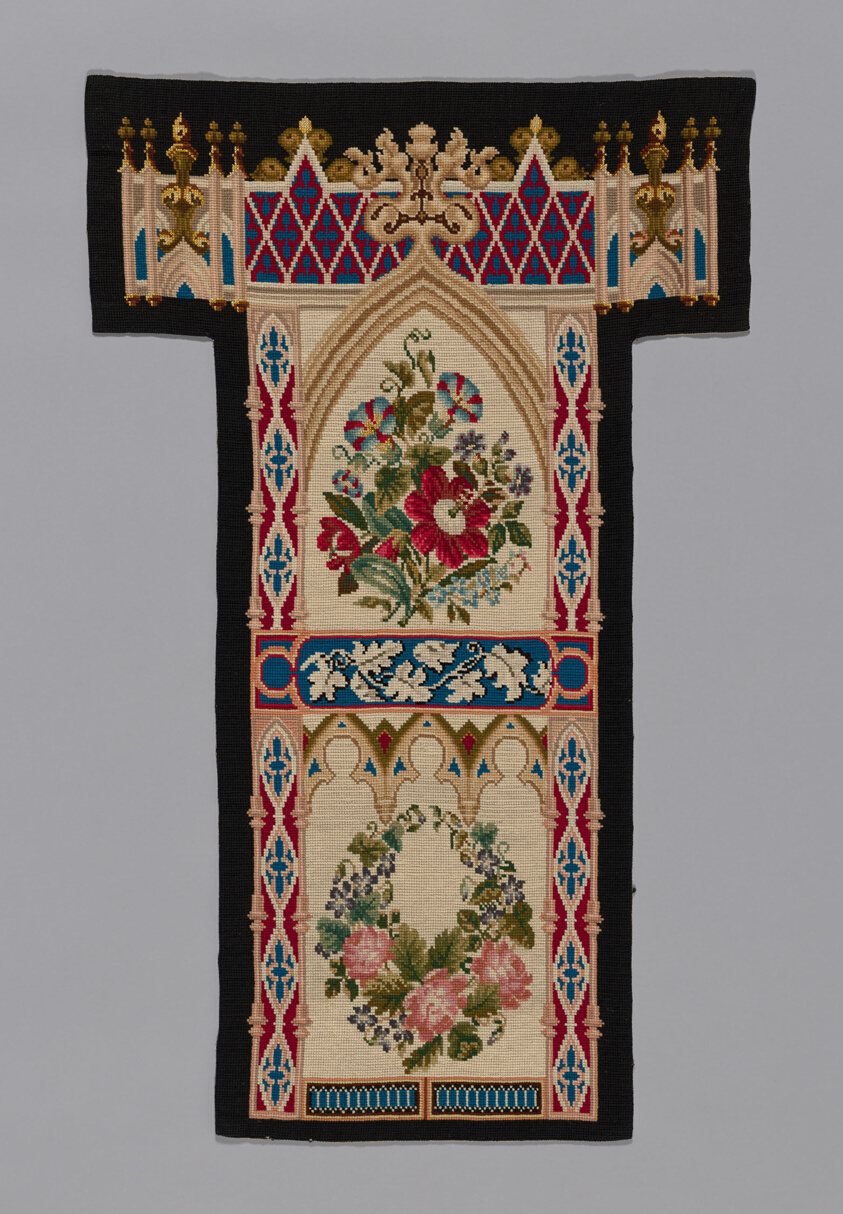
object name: Textile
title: Prie-Dieu Cover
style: victorian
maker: England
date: c. 1857/60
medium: Cotton, plain weave; embroidered with wool and silk in cross stitches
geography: England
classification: textile; needlework (visual works)